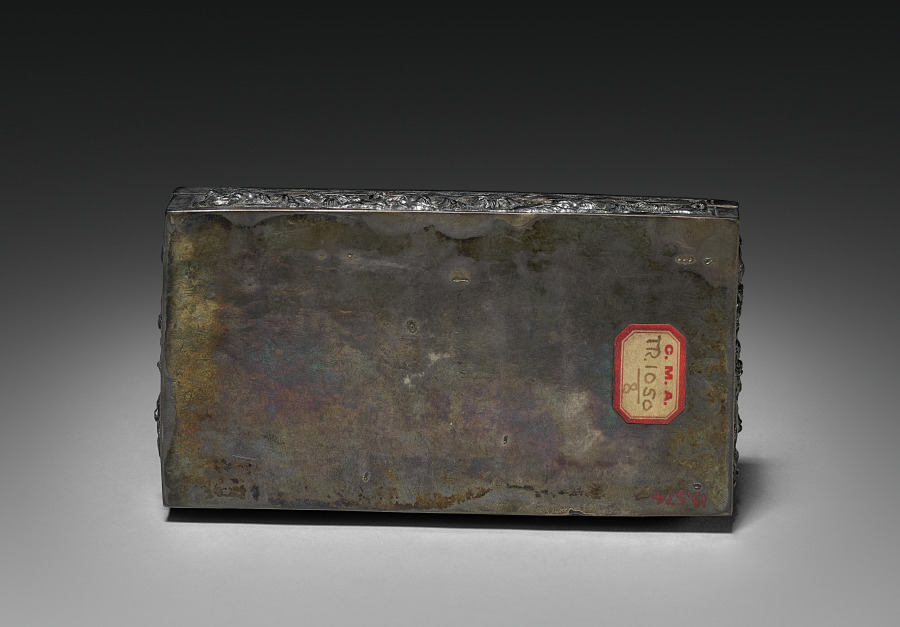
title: Rectangular Box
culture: Siam, 19th century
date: 1800s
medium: silver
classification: Metalwork